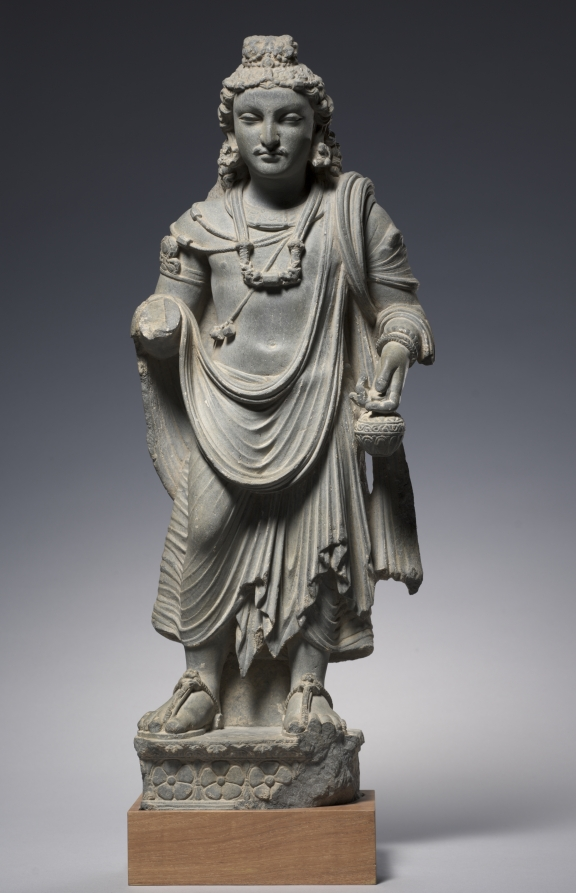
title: Maitreya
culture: Pakistan, Gandhara, Kushan period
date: c. 200s CE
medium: gray schist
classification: Sculpture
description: The water bottle in his left hand indicates that this figure depicts the bodhisattva Maitreya. It is thought that Maitreya will reach enlightenment after the teachings of the Buddha have been forgotten, in order to spread the teachings again.